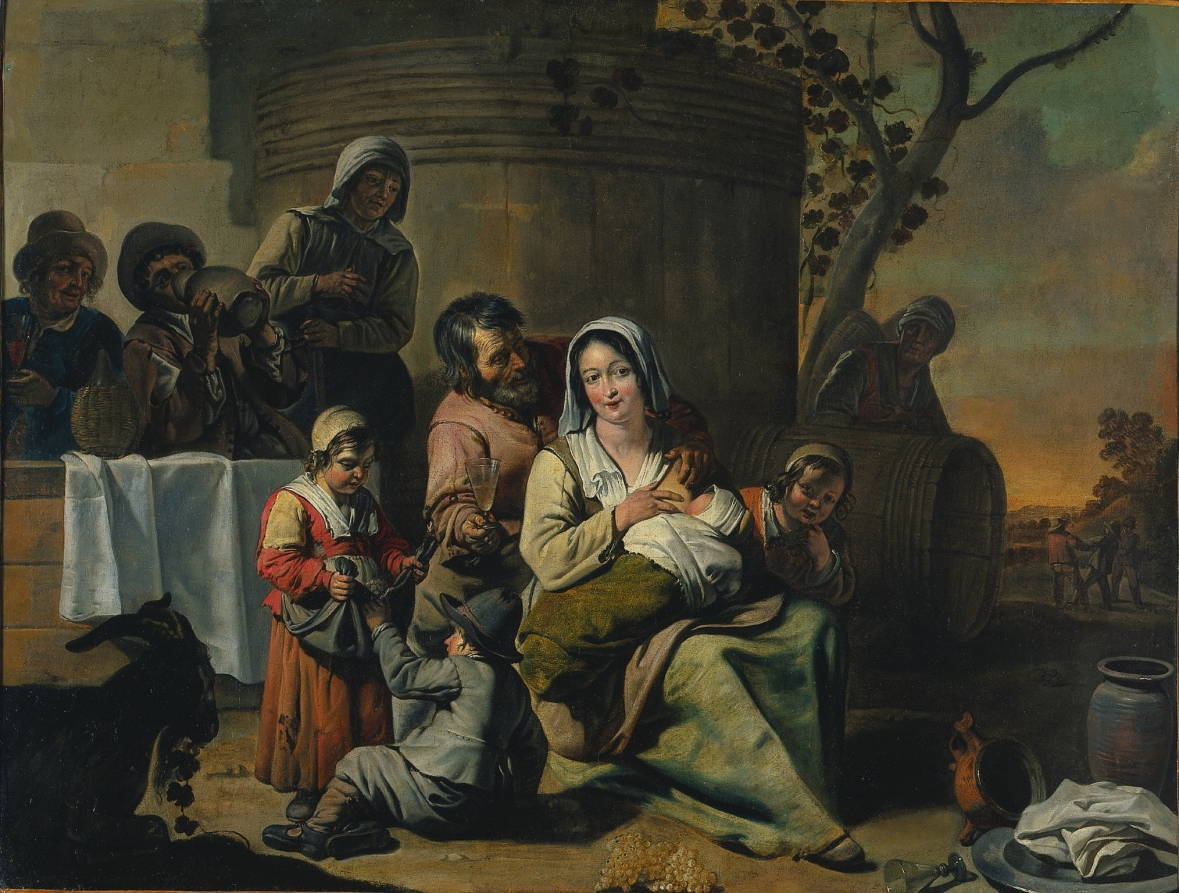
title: Vintage Scene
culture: France, 17th century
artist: circle of Le Nain (French)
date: 1650s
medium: oil on canvas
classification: Painting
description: The mid-17th century saw revived interest in representations of the lower classes. Artists like the Le Nain brothers in France painted scenes that looked back to the Renaissance tradition of pastoral imagery. The Le Nain often depicted ordinary country folk going about their daily business, subjects and figures they remembered from their childhood in rural Laon. Considered a companion piece to Peasant Children Dancing (1958.175.2), Vintage Scene has also been attributed to the Master of the Béguins, a Flemish artist who worked in the manner of the Le Nain in Paris. Here, good-natured though bawdy men drink in the background shade, while a sweet-faced young woman in the center surrounded by chubby children flashes the viewer a coy smile that reveals her awareness of the slowly creeping hand of her drunk companion. While peasants drinking was a popular subject among Flemish artists, the theme of wine connects the subject with the grape harvest, which recalls the Le Nain's agricultural homeland in France. This use of both aesthetic and biographical aspects of the Le Nain's lives demonstrates the Master of Béguins's ability to absorb the stylistic and thematic lessons of the famous brothers.